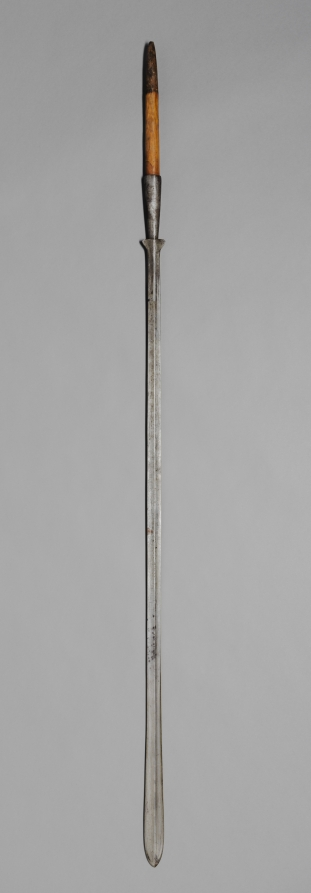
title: Fragment of a Spear (eng'erempe or eremet)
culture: Africa, Eastern Africa, Kenya, Masaai style, unknown maker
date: 1900s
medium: iron and wood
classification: Arms and Armor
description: Masaai men of different ages use different styles of weapons. Though this example is incomplete, the long, flat blade indicates that it once belonged to a man whose age group was called moran (junior warrior). Held at the middle by the wood shaft, the weighty spear was balanced by a now-missing butt end, essentially a slender metal spike. These weapons were practical, and were often used by moran in lion hunting.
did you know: This spear was used along with a shield.